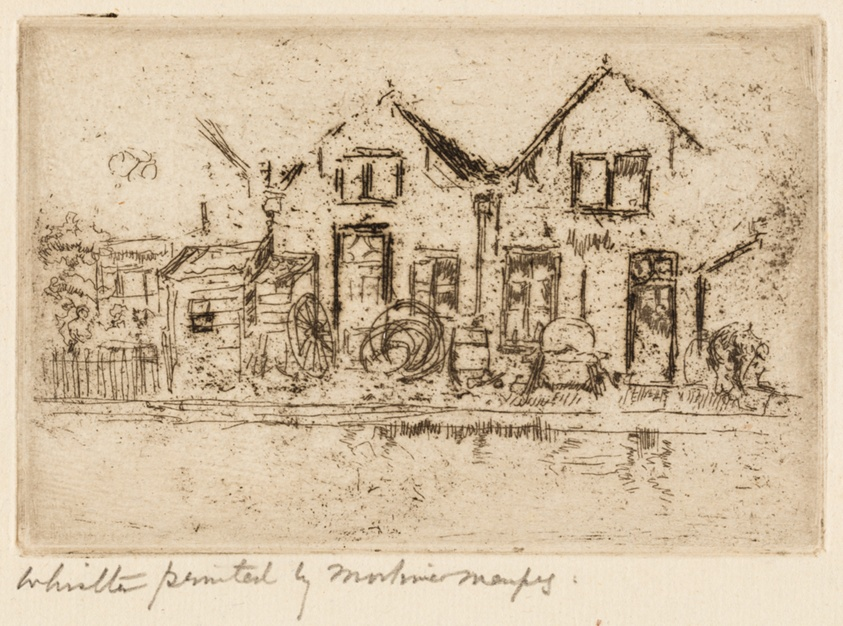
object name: Print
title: The Little Wheelwright's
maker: James McNeill Whistler (American, 1834-1903)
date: 1886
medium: Etching with foul biting and plate tone in black on cream laid paper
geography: United States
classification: etching; foul biting; print; prints and drawing; paper